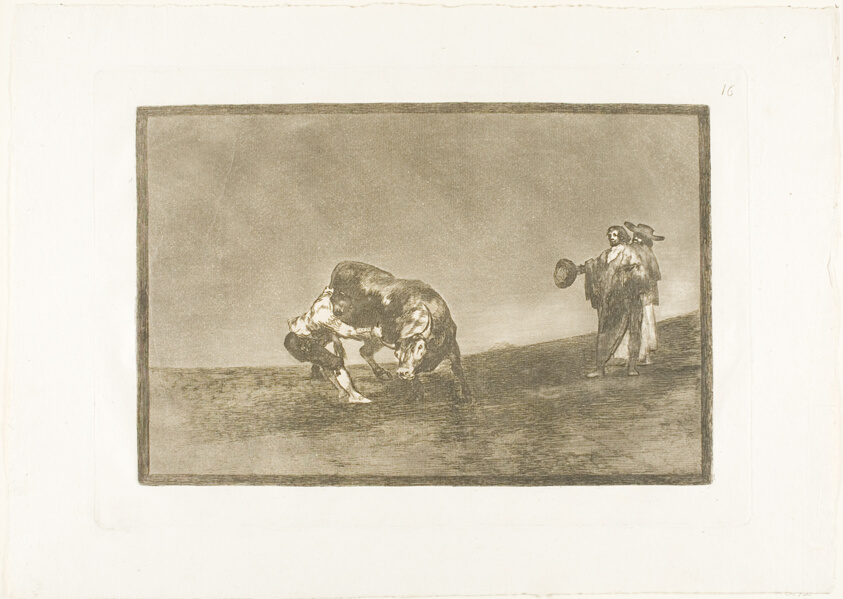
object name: Print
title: The Same Man Throws a Bull in the Ring at Madrid, plate 16 from The Art of Bullfighting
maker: Francisco José de Goya y Lucientes (Spanish, 1746-1828)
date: 1814/16, published 1816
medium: Etching, burnished aquatint, drypoint and burin on ivory laid paper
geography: Spain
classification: etching; print; prints and drawing